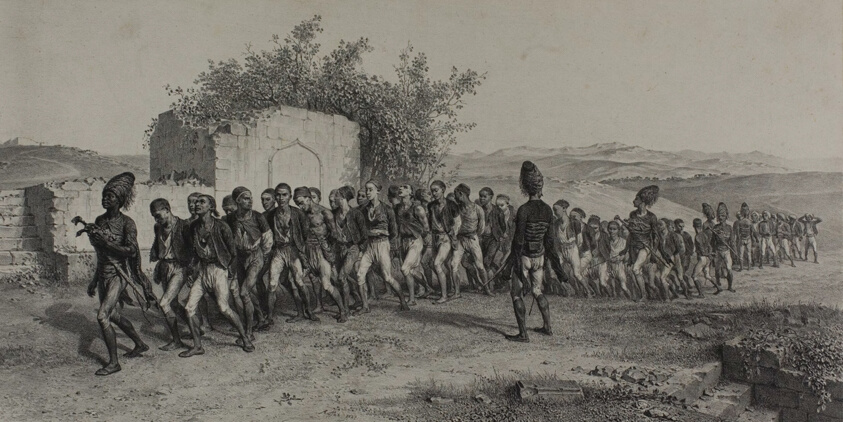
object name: Print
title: Turkish Recruits Near Smyrna, November 10, 1837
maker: Denis Auguste Marie Raffet (French, 1804-1860); printed by Auguste Bry (French, 19th century); published by Chez Gihaut Frères (French, 19th century)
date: 1847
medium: Lithograph in black on ivory chine laid down on buff wove paper laid down on ivory card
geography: France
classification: lithograph; print; prints and drawing